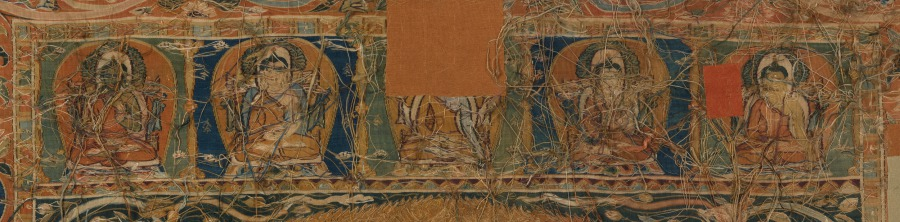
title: Achala, King of the Wrathful Ones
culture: China, Zhejiang Province, probably Hangzhou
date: early 1200s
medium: Thangka, silk tapestry with pearls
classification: Textile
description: The powerful blue body of Achala, meaning “immovable,” dominates the composition. He holds a sword to cut through ignorance and a noose for catching illusions that plague the path to enlightenment. Small personifications of furious destroyers of illusion (maya) emanate from him on either side, each with his own weapon. This image expresses what advanced practitioners would visualize in meditation rituals, as explained in Buddhist texts called tantras. Woven with a sophistication matched only by products of the Hangzhou looms, this devotional tapestry made its way to Khara-Khoto, capital of the Tangut Empire located in present-day Mongolia and Central Asia, where tantric Buddhism was prevalent.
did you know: The elephant-headed figure under his left foot is a demonic divinity, a yaksha, who creates obstacles to enlightenment.